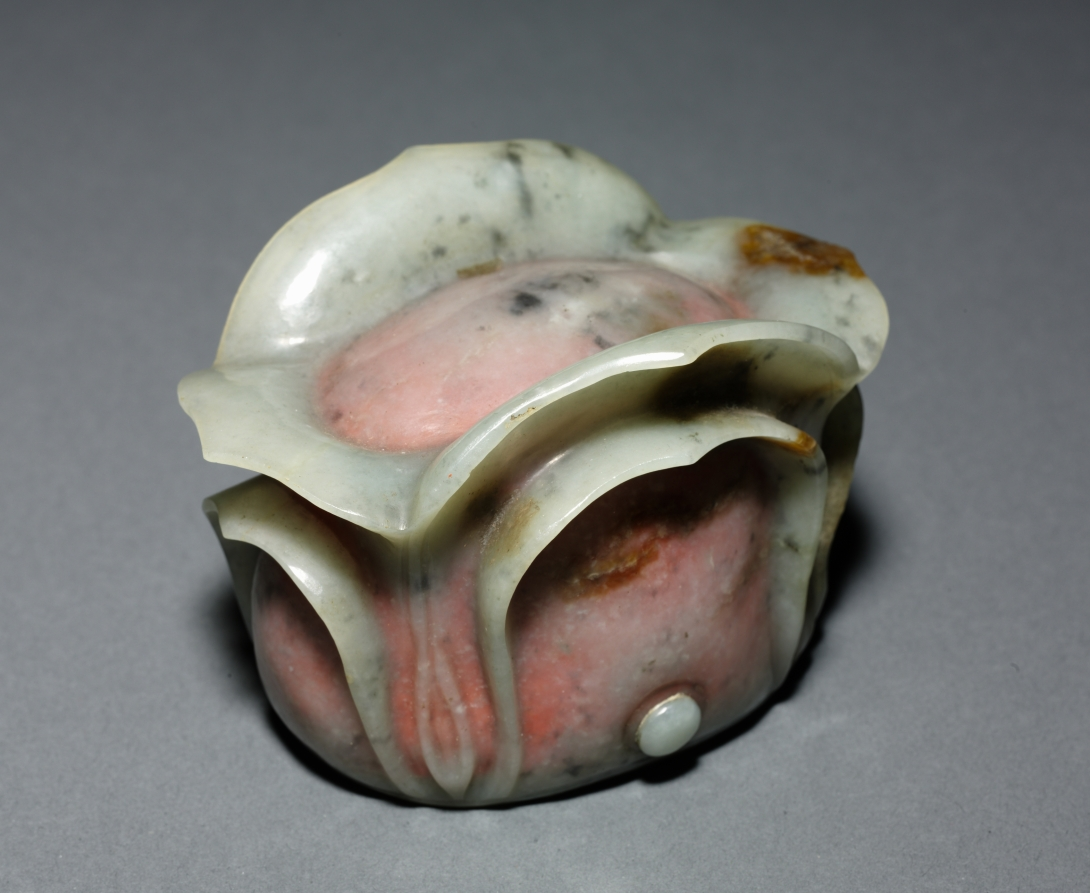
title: Daoist Cap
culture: China, Song dynasty (960-1279) - Yuan dynasty (1271-1368)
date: 960–1279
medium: grayish-green jade with brown and black markings; interior with pink pigment and gold inlays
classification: Jade